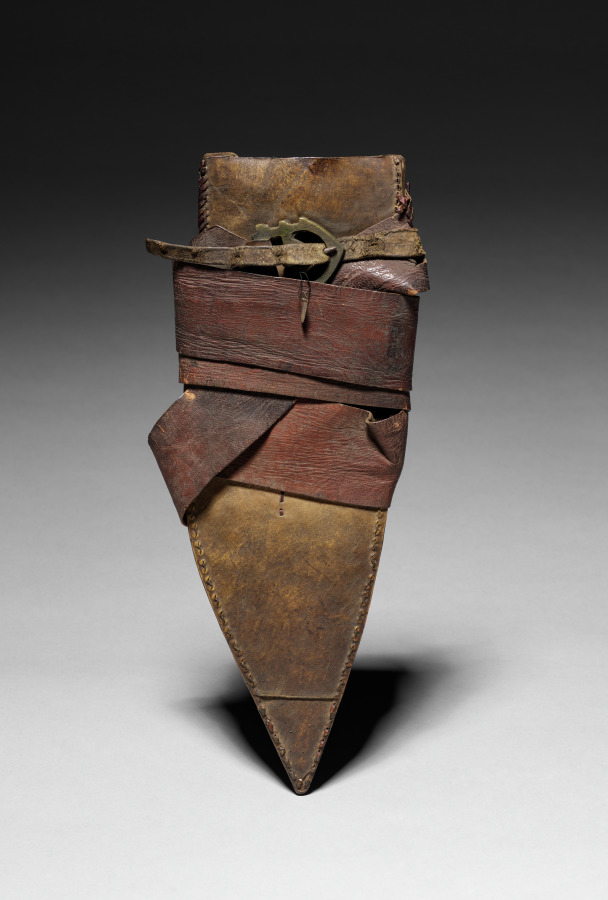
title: Sheath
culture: Africa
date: 1800s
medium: Leather or rawhide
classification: Arms and Armor